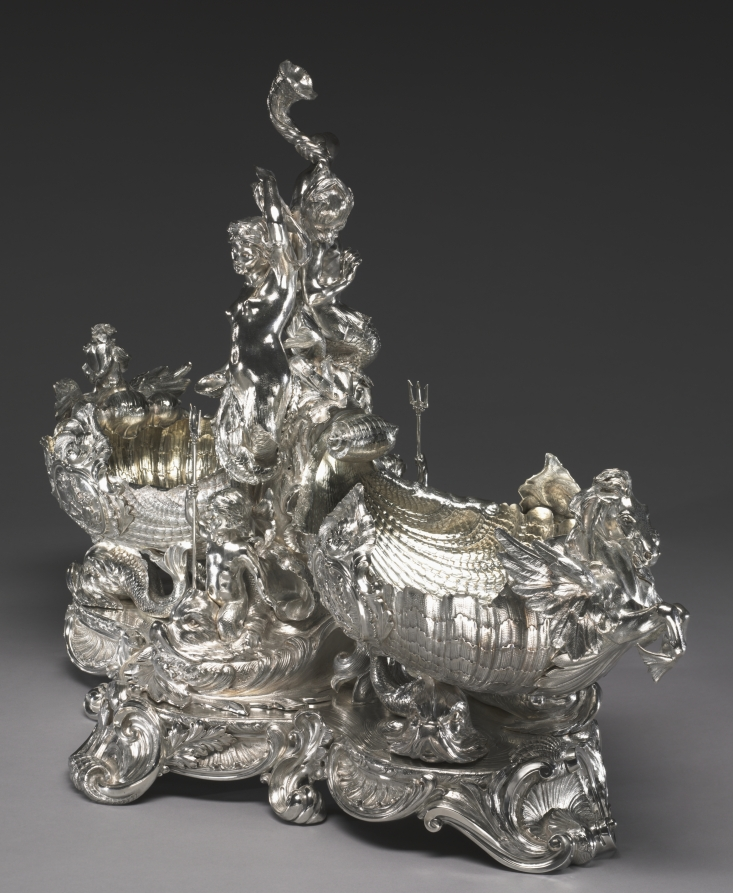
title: Centerpiece from the Nereid Service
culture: England, late 19th-early 20th century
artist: Goldsmith's & Silversmith's Company (British)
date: c. 1900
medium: silver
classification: Silver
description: Originally thought to have been made by the early 19th-century London silversmith Paul Storr because it had been marked with spurious Storr hallmarks, more recent scholarship has revealed that this service, representing the triumph of Great Britain on the high seas through the allegorical images of Grecian nymphs (nereids), was actually made to display at the 1900 world's fair in Paris. Such nationalistic fervor permeated design at the turn of the 20th century, especially in the years leading up to the First World War, when national pride was brought to its heels in Europe through a devastating conflict.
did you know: This centerpiece is actually the product of many hands since the Goldsmiths' and Silversmiths' Company operated as a cooperative of silversmiths who sold their work through the company.